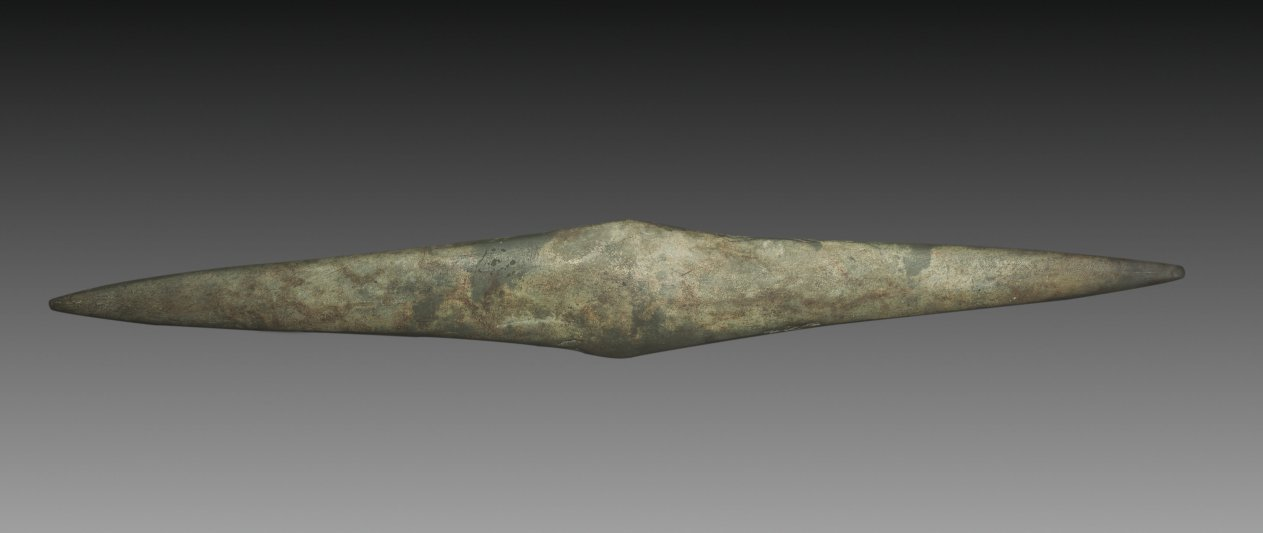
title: Rhomboidal Palette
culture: Egypt, Predynastic (5000–2950 BCE), Naqada I (3900–3500 BCE)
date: 4000–3500 BCE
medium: graywacke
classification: Implements